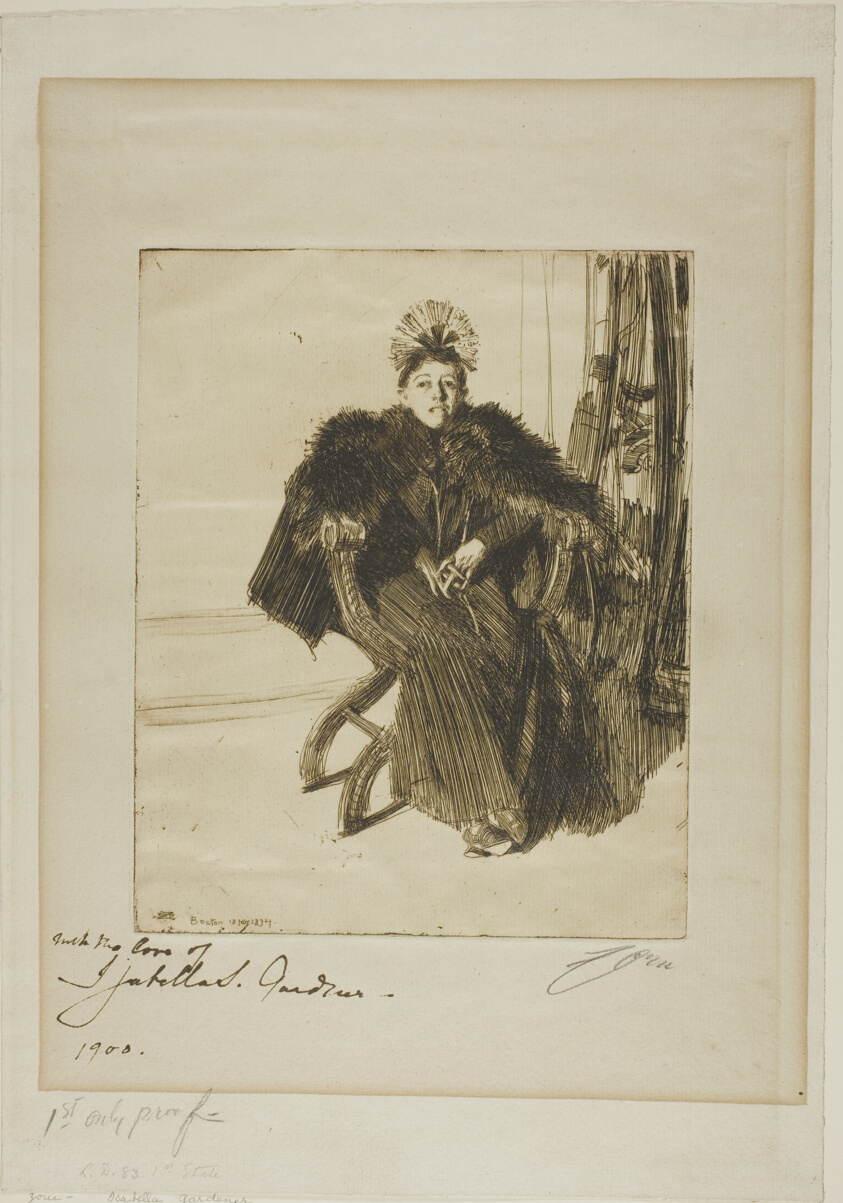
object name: Print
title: Isabella Gardener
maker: Anders Zorn (Swedish, 1860-1920)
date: 1894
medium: Etching on ivory laid paper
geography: Sweden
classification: etching; print; prints and drawing